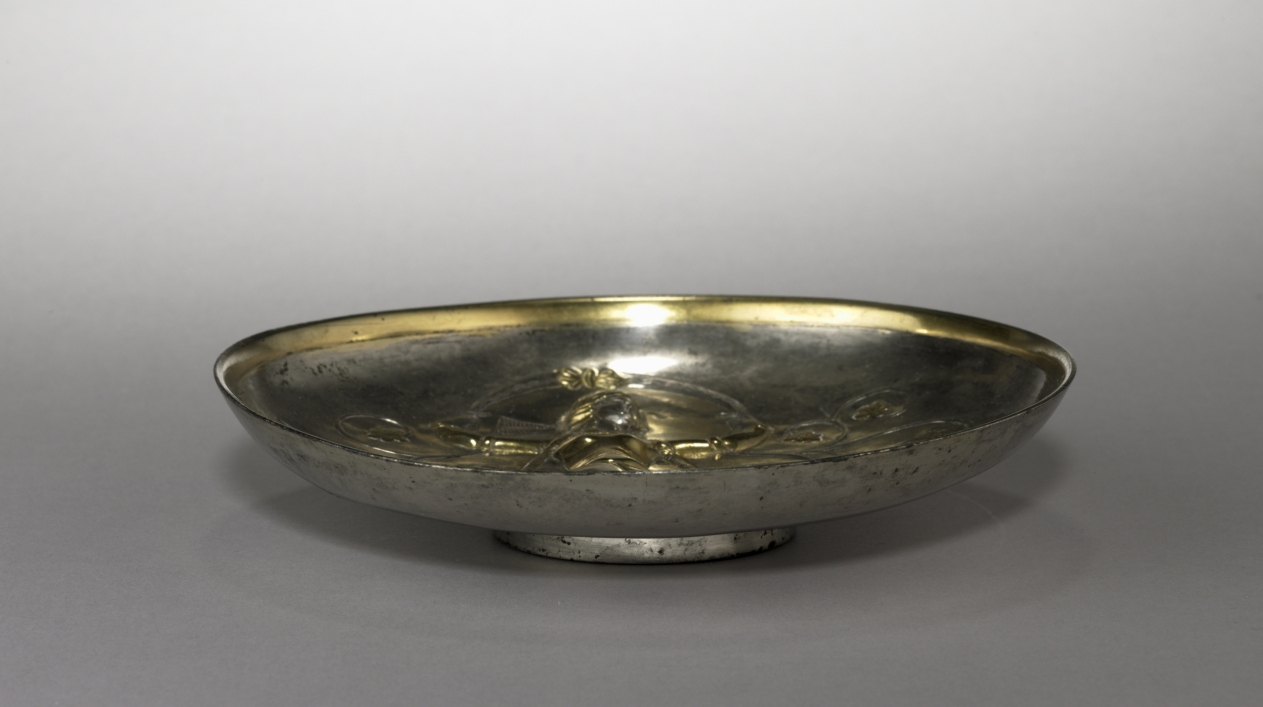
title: Dish: The Goddess Anahita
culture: Iran, Sasanian Empire (224–651 CE)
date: 400–600 CE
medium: silver gilt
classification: Metalwork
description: Anahita, the Zoroastrian goddess of water and fertility, was one of the last of the ancient tradition of Near Eastern nude mother goddesses.